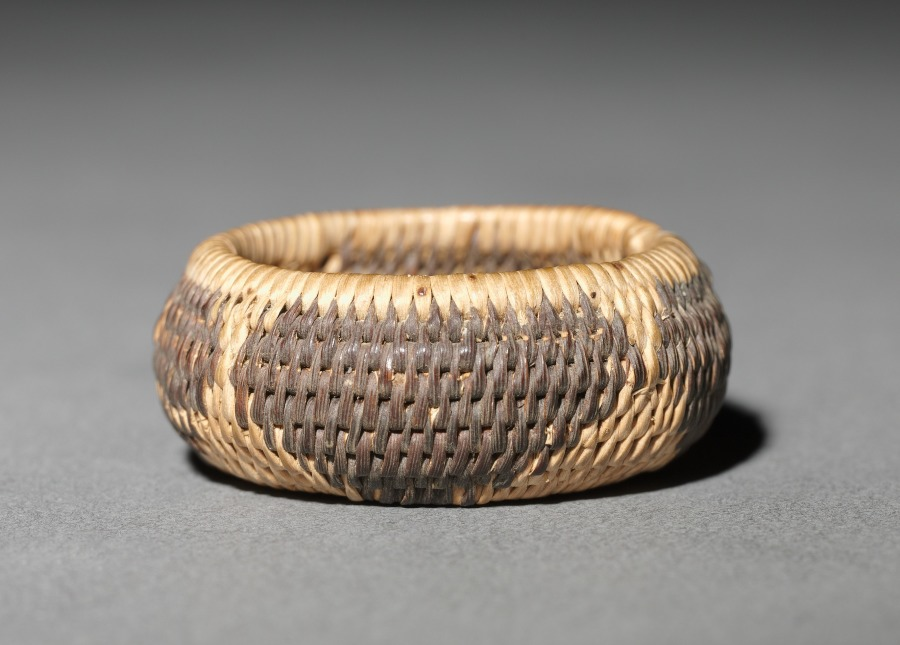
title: Miniature Basket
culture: America, Native North American, Southwest, Arizona, Akimel O'odham (Pima), Unassigned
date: before 1923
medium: plant fiber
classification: Basketry